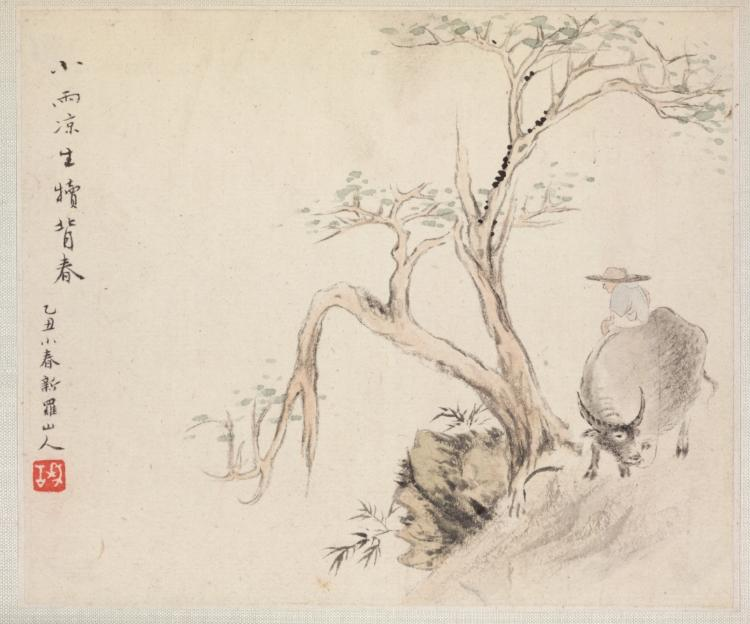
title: Album of Landscape Paintings Illustrating Old Poems: Boy Tending a Water Buffalo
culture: China, Qing dynasty (1644-1911)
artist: Hua Yan (Chinese, 1682–c. 1765)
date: 1745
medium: Album leaf; ink and light color on paper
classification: Painting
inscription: 小雨涼生犢背春 / 乙丑小春新羅山人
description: Hua Yan is one of the Eight Eccentrics of Yangzhou, who rejected Orthodox ideas about painting.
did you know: Tending water buffalos has traditionally been the task of young boys and can still be seen in rural areas of Southern China today.